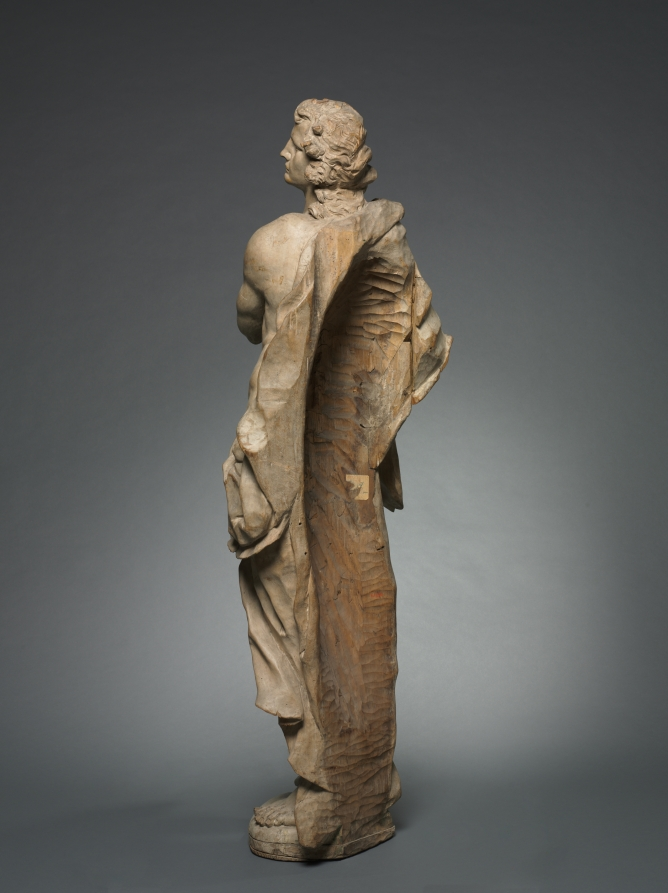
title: A Saint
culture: Germany or Austria, 18th century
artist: follower of Diego Francesco Carlone (Italian, 1674–1750)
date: c. 1730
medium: wood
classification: Sculpture